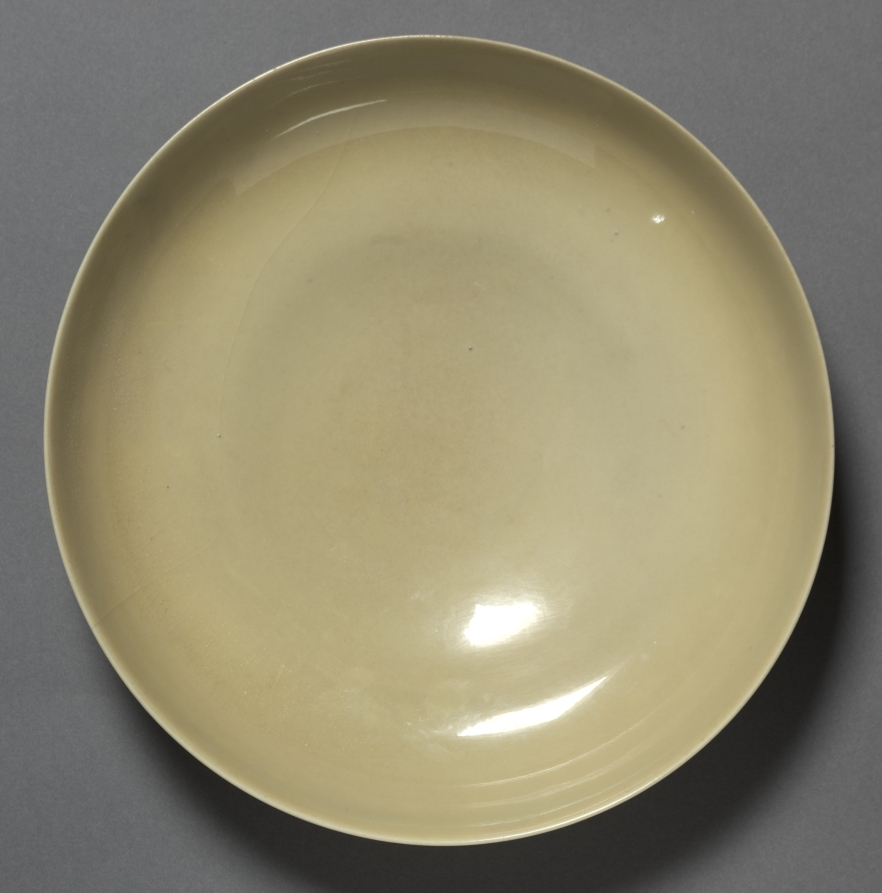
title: Dish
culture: China, Jiangxi province, Jingdezhen, Ming dynasty (1368-1644), Chenghua mark and period (1465-1487)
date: 1465–87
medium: porcelain with yellow glaze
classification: Ceramic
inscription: 大明成化年製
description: Former director Sherman Lee stressed the significance of technical innovation in his study of Chinese ceramics. He believed that "in the great Chinese [ceramic] tradition one can say that its major theme is the development and refinement of monochrome stoneware and porcelain . . . [E]ven in the Ming and Qing dynasties, equal attention was given to monochrome reds and yellows." This masterpiece of Ming monochrome ware was part of the Millikins' generous bequest, one that significantly augmented the museum's already strong holdings of Chinese ceramics. Lee pointed out that with this bequest the museum's collection is "reasonably complete and, even better, represented by works of high quality."